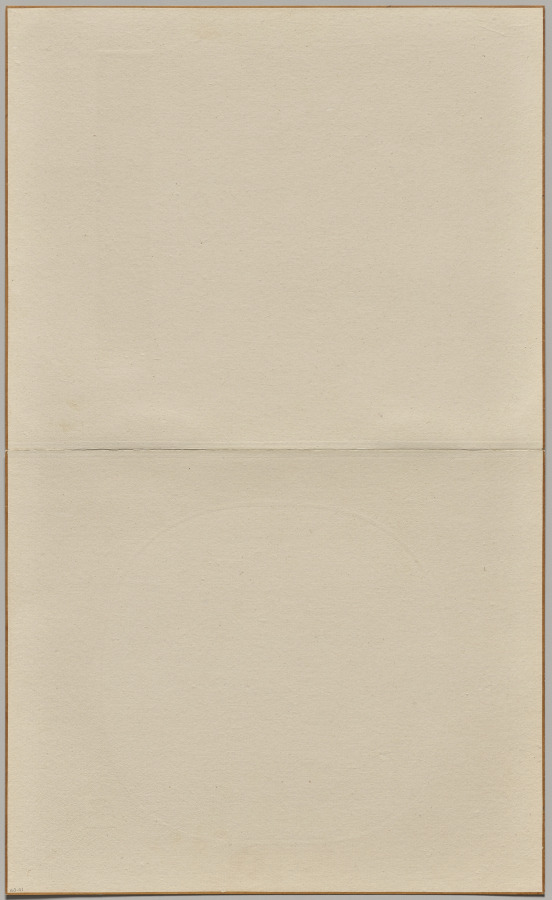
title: Man, Buffalo, and Calf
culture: China, Southern Song dynasty (1127-1279)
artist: Li You (Chinese, active c. 1145)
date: 1145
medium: album leaf; ink and color on silk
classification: Painting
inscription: Artist's inscription: 乙丑歲李祐/椿畫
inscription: 3 seals: 1 of Wu T'ing (c. 1600); 1 of An Kuo (1481–1534); 1 of Li Pao-hsün (1858–1915)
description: Here, a herdboy tending a cow with a calf is sitting beneath a tree with his pet myna bird. The painting can be read as a pastoral scene. As the water buffalo helped plow the fields, it was perceived as an animal that endures hard work without gain for itself, often interpreted as a metaphor for the official. Ox-herding pictures, presented as gifts in court circles, were used for their moral and political rhetoric. The Yijing (Book of Changes) states, The Receptive is the earth, the mother . . . it is a cow with a calf . . . the multitude [in relation to the ruler].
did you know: Li You included such tiny details as circular patterns of hair on the buffalo’s hindquarters.